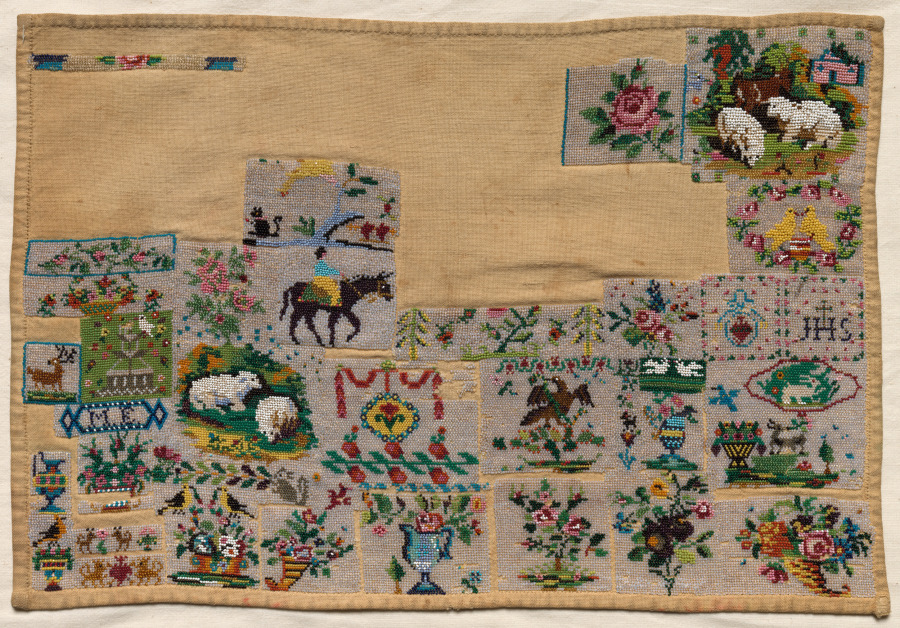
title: Sampler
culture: Mexico, 19th century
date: 1800s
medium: embroidery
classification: Sampler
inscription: initials "M.E." enclosed in ornamental border on left side; "IHS" on right side.